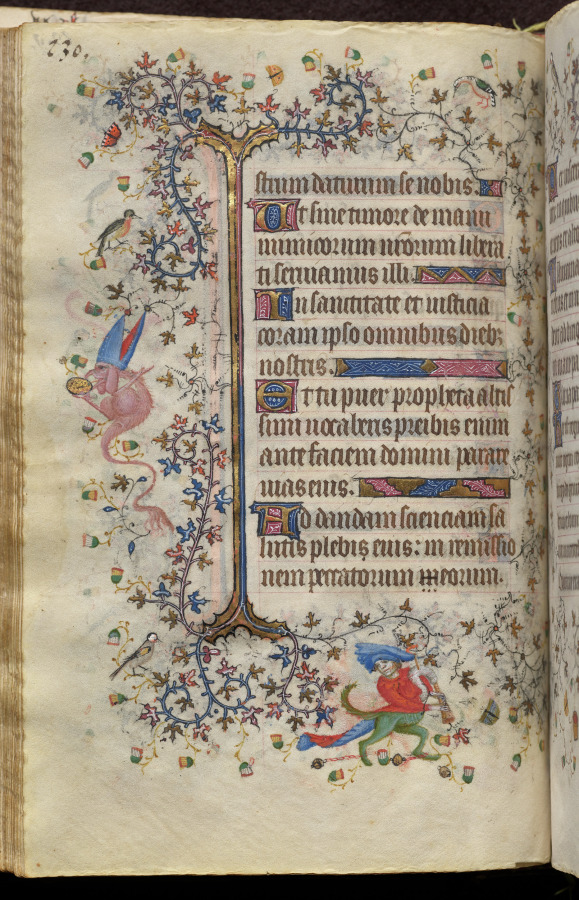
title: Hours of Charles the Noble, King of Navarre (1361-1425): fol. 65v, Text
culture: France, Paris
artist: Master of the Brussels Initials and Associates (French)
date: c. 1405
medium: ink, tempera, and gold on vellum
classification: Bound Volume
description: This precious volume was obviously highly prized by its owner, the French-born King of Navarre, who had his coat of arms painted on no less than twenty folios. Rather than directly commissioning this manuscript from a specific workshop, it seems that Charles the Noble acquired his book of hours -- perhaps ready-made for the luxury market -- while on a trip to Paris in 1404-05. A collaborative effort, six painting styles are evidenced within the pages of this codex, those of two Italians, two Frenchmen, and two Netherlanders. The painter who was responsible for the planning and decoration of the book, and who produced seventeen of the large miniatures, was a Bolognese artist known as the Master of the Brussels Initials. His principal assistant, responsible for most of the borders, was a Florentine who signed his name "Zecho" da Firenze on folio 208 verso.